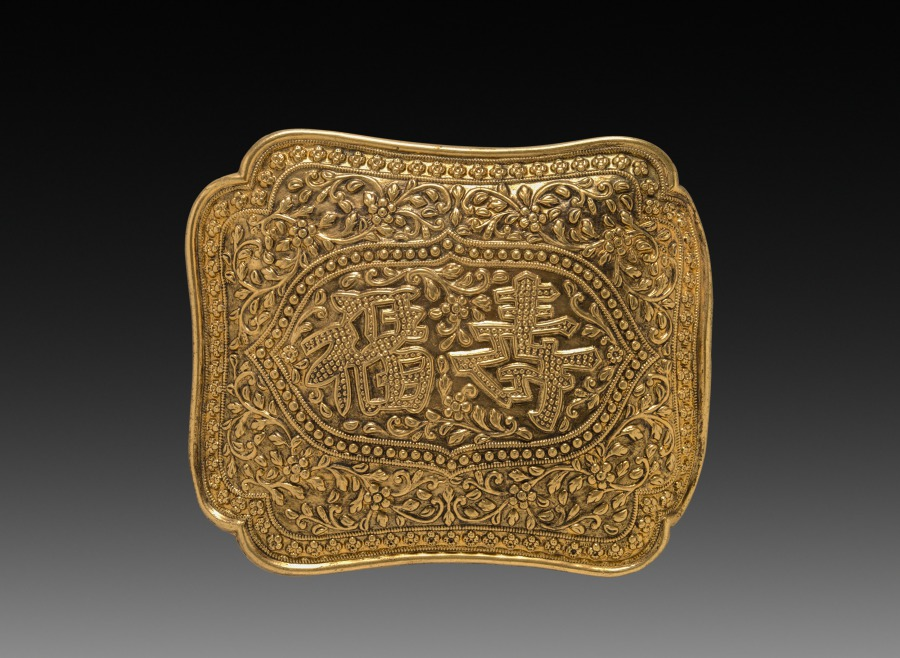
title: Buckle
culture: China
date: 1900s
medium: silver gilt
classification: Jewelry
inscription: 福壽